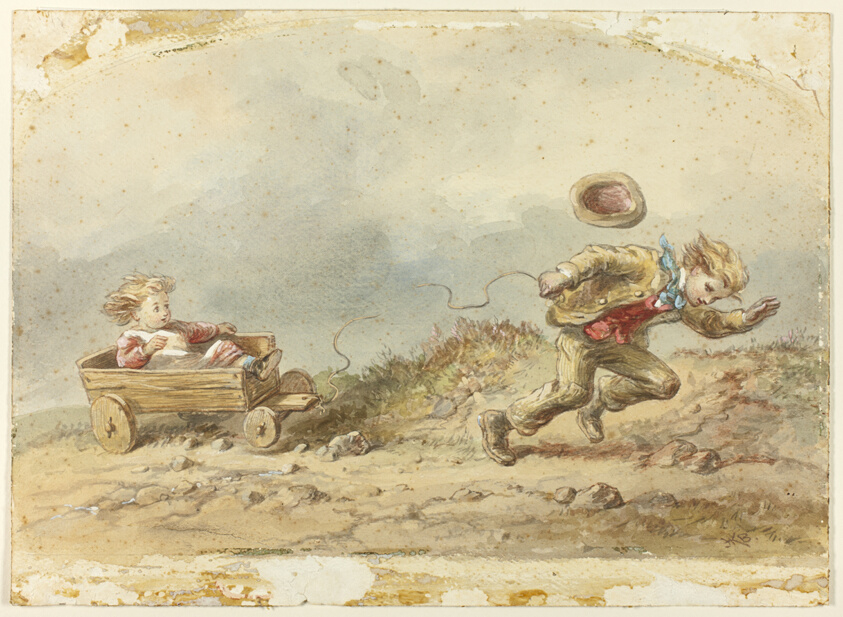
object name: Drawing and Watercolor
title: The Broken Cart-Rope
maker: Hablot Knight Browne (English, 1815-1882)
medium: Watercolor, with touches of blue and pink gouache and red chalk, heightened with touches of white gouache, over traces of charcoal, on ivory wove paper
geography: England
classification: watercolor; drawings (visual works); prints and drawing